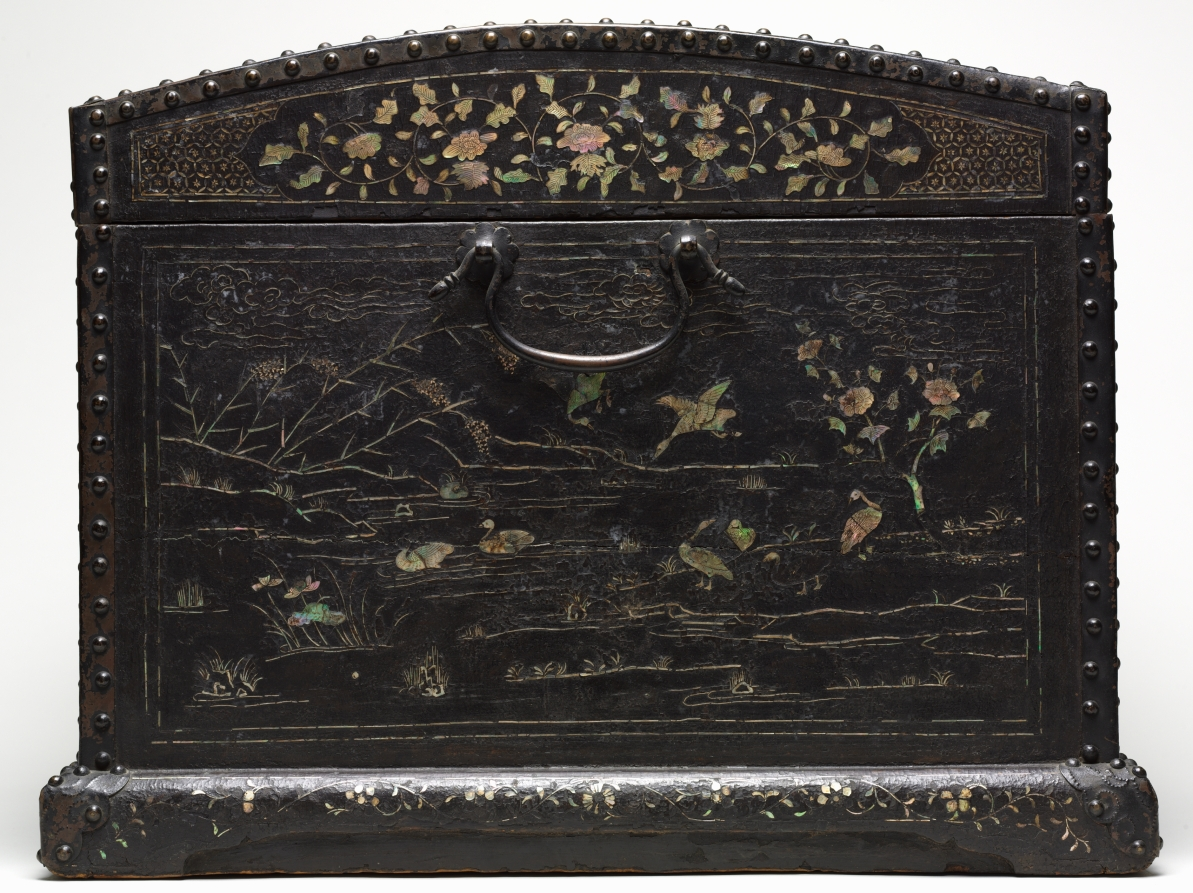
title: Chest for Storing Garments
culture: China, Ming dynasty (1368–1644)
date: 1400s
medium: lacquered wood with mother-of-pearl inlay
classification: Lacquer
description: This precious lacquer box is decorated with bird and plant motifs and figures in mother-of-pearl inlay. The decoration depicts the leisurely pursuit of scholars in nature and a garden setting. Scholars play the board game weiqi, have philosophical conversations, pluck a qin (a zither-like instrument with strings), and read books. Lacquer chests of this type were used to store garments neatly folded along their straight seams. The mother-of-pearl inlay from shells is a technique that was typically practiced by craftsmen in Hangzhou and other parts of southeast China near the sea.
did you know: Lacquer chests of this type were used to store garments.